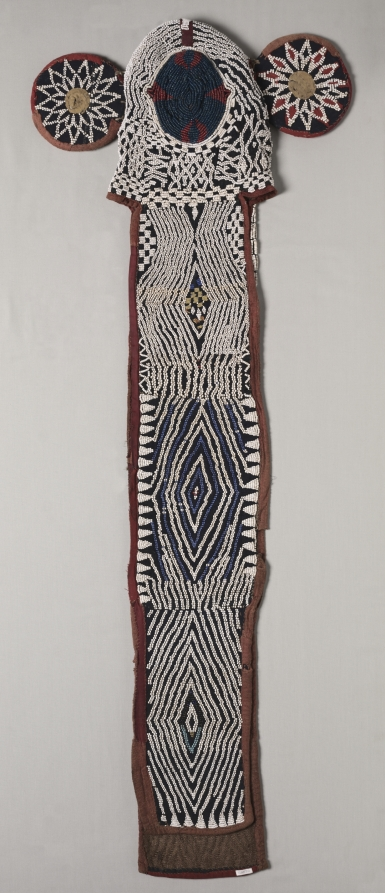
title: Mask (mbap mteng): Elephant (aka)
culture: Africa, Central Africa, Cameroon, Grassfields region, Bamileke-style maker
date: early 1900s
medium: Cotton, burlap, glass beads, twine, leather, and wood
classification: Mask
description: The name given to masks like this, mbap mteng, means "animal with huge ears." In the Cameroon Grassfields kingdoms, the elephant signifies power, authority, prestige, and leadership. The colorful glass beads that decorate the mask’s surface were imported from Venice and Bohemia (in Europe) and signal wealth and prosperity. Its geometric patterns include triangles that evoke the leopard, another animal linked with royal power. Members of Kuosi, an elite male society, wore such elephant masks for ritual dances and funerary ceremonies. This mask would have been worn with a costume that included a feather headdress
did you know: Performers wore elephant masks with indigo-dyed robes, red feather headdresses, and leopard pelts. Leopards and elephants symbolized royal power.